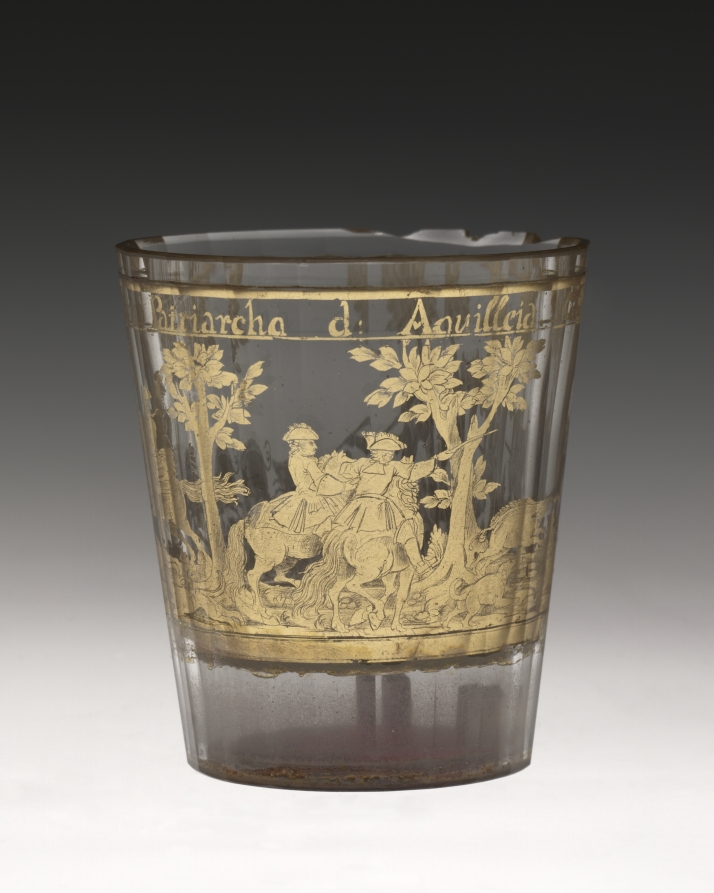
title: Tumbler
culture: Bohemia, 18th century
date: c. 1730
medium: zwischengoldglas (glass)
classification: Glass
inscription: in gold, around rim of glass: Monsigr. Daniel Delfino Patriarcha di Aguilleid